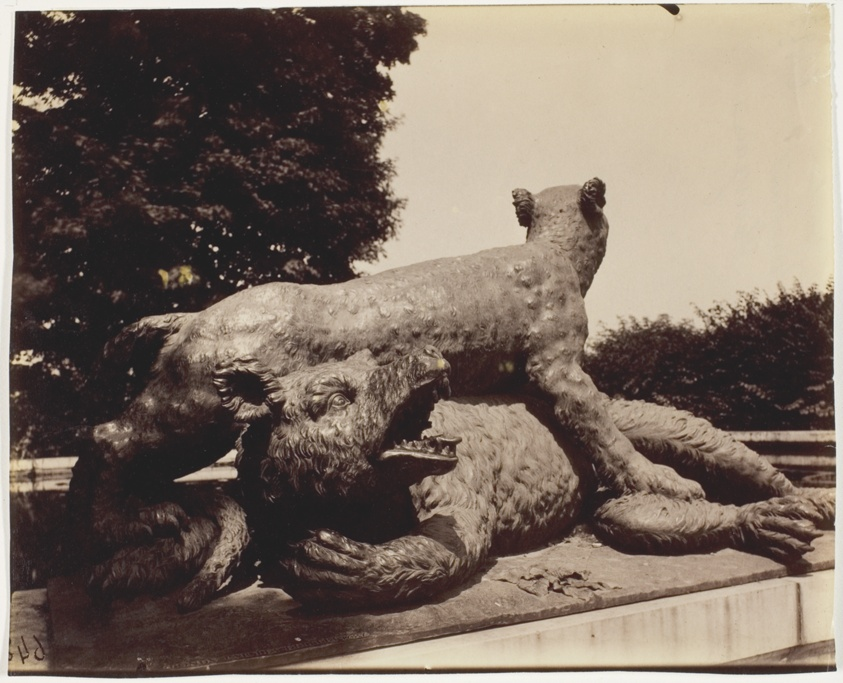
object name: Photograph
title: Versailles, Fontaine du Point du Jour, (Tigre Terrassant un Ours par Houzeau)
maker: Jean-Eugène-Auguste Atget (French, 1857–1927)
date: 1903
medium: Albumen print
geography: France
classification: albumen silver print; photographic process; photography; photograph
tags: Collected by Hugh Edwards